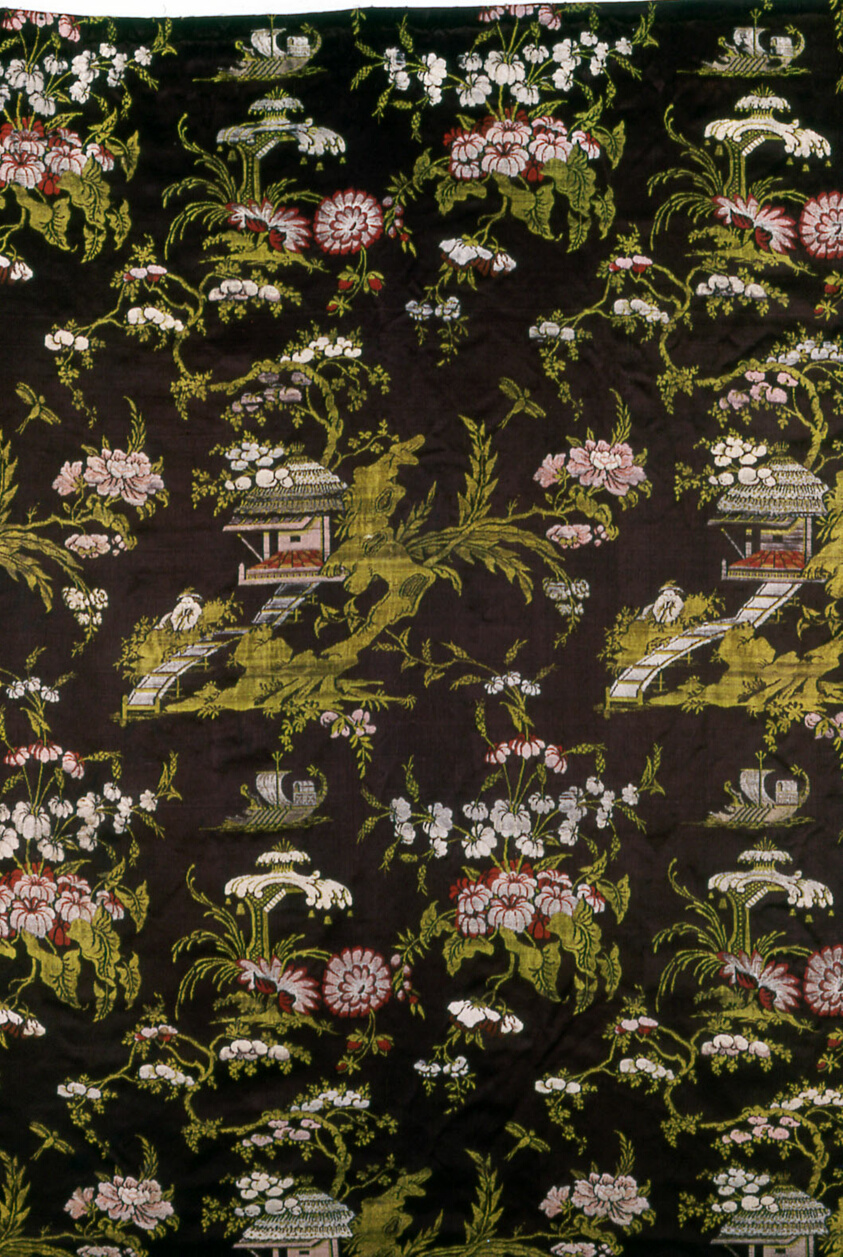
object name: Textile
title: Panel (Furnishing Fabric)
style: chinoiserie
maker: Design in the Style of Jean Baptiste Pillement (French, 1728–1808); Probably France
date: 1760s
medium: Silk, warp-float faced 7:1 satin weave with supplementary brocading wefts and self-patterned by areas of weft-float faced 3:1 twill interlacings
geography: France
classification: textile; weaving; furnishing textile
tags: foliage, Floating Gardens